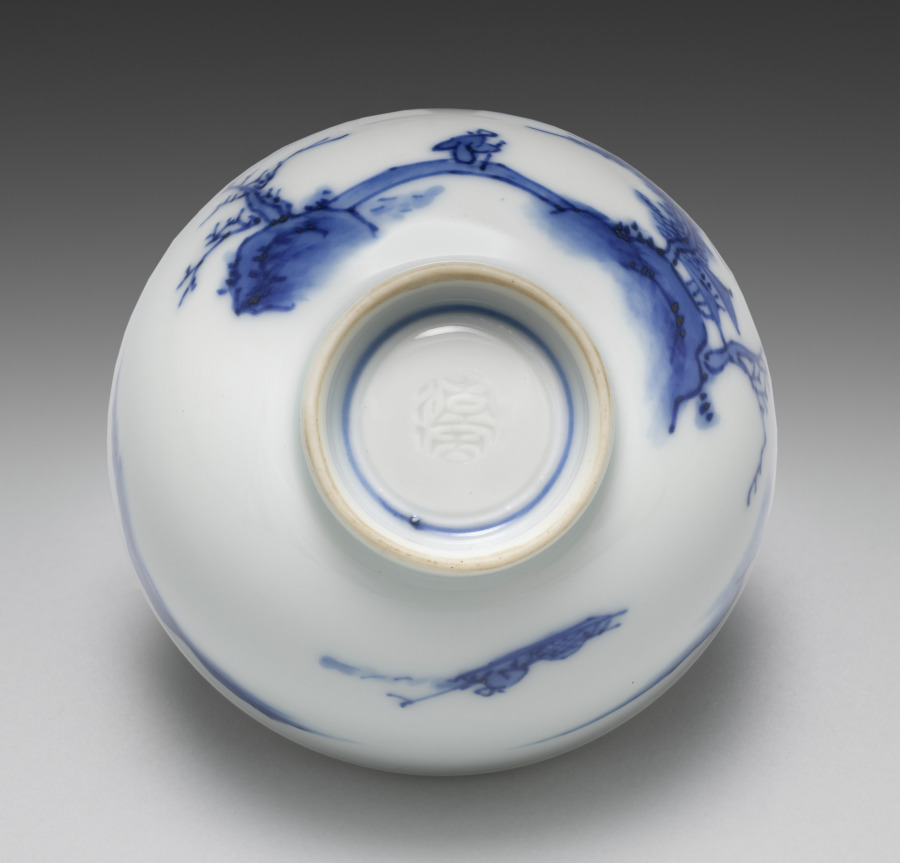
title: Teacup from Tea Set with Chinese Landscape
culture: Japan, Meiji period (1868–1912)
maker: Seifū Yohei III (Japanese, 1851–1914)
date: 1893–1914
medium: Porcelain with underglaze blue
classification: Ceramic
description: This tea set has a side-handled pot called a kyūsu, used for steeping, straining, and serving tea. Unlike some others, this set also has a yuzamashi, a container used to cool boiled water to just the right temperature for the best flavor when steeping. Seifū Yohei III’s painting teacher, Tanomura Chokunyū (1814–1907), made a visual record of famous sencha events that shows how these kinds of porcelains fit with objects such as a stove and kettle to form a complete set of utensils for tea preparation, and with ensembles of decorative objects meant to inspire creativity. The theme of this sencha tea set is the Chinese scholar-recluse in an idyllic landscape. Each of the five teacups has a landscape with an architectural structure and some human activity.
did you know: This cup shows a man in a traveling robe leaning upon his staff as he crosses a bridge to reach a two-story building with a pitched roof, possibly a temple, set between trees. Past this structure, another man sits fishing in a boat.